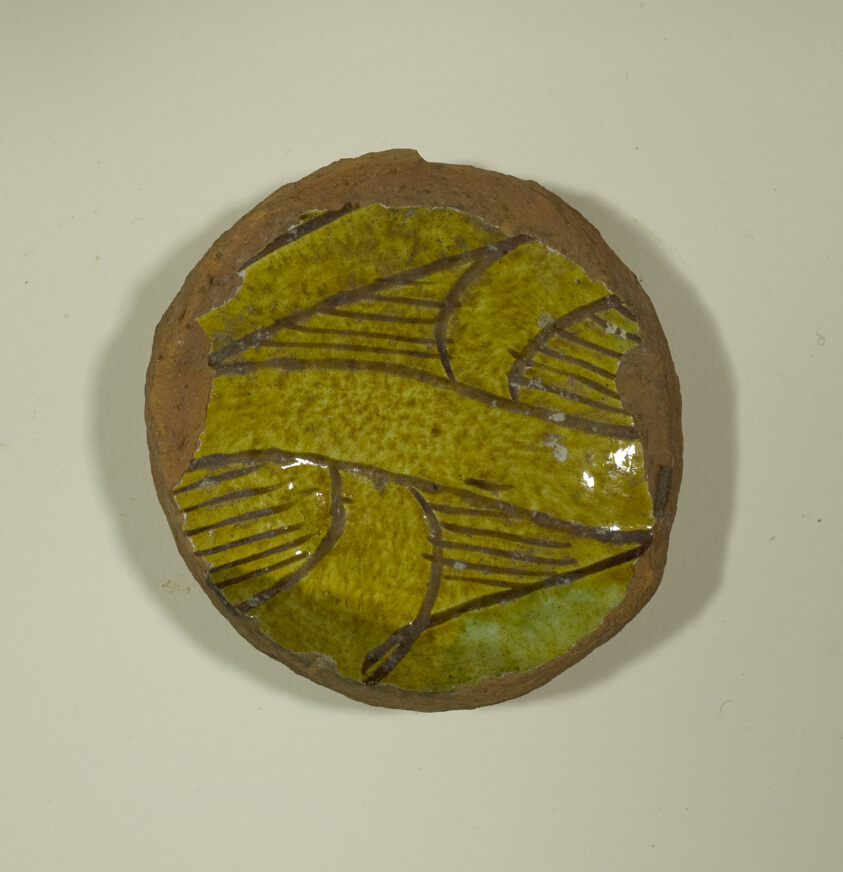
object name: Decorative Arts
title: Fragment from the Base of a Bowl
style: byzantine, european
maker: Byzantine; Thessaloniki, Greece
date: 13th-14th century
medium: Glazed terracotta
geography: Istanbul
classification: fragment; ceramics; vessel; bowl; asian art; decorative arts